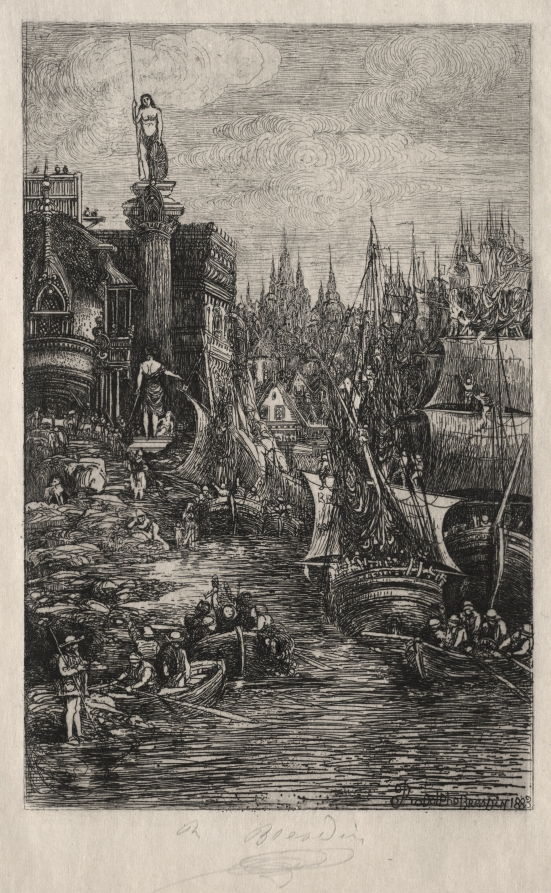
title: My Dream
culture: France, 19th century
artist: Rodolphe Bresdin (French, 1822–1885)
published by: Bizolier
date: 1883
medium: etching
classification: Print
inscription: signed, lower center, in graphite: R. Bresdin; signed and dated, lower right, in plate: Rodolphe Bresdin 1883